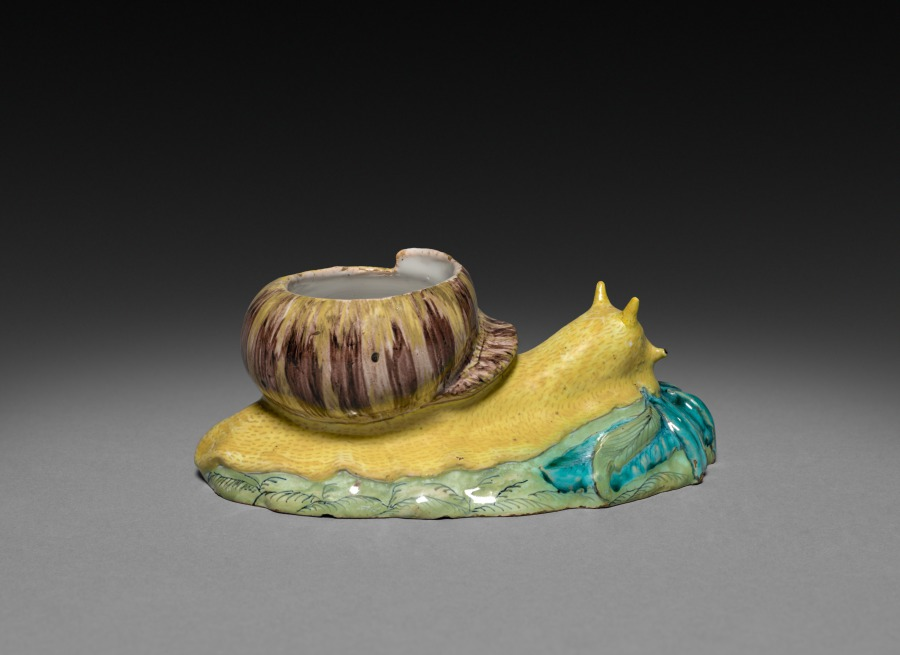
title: Box in the Form of a Snail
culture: France, 18th century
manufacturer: Strasbourg Factory (France)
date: c. 1750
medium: faience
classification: Ceramic